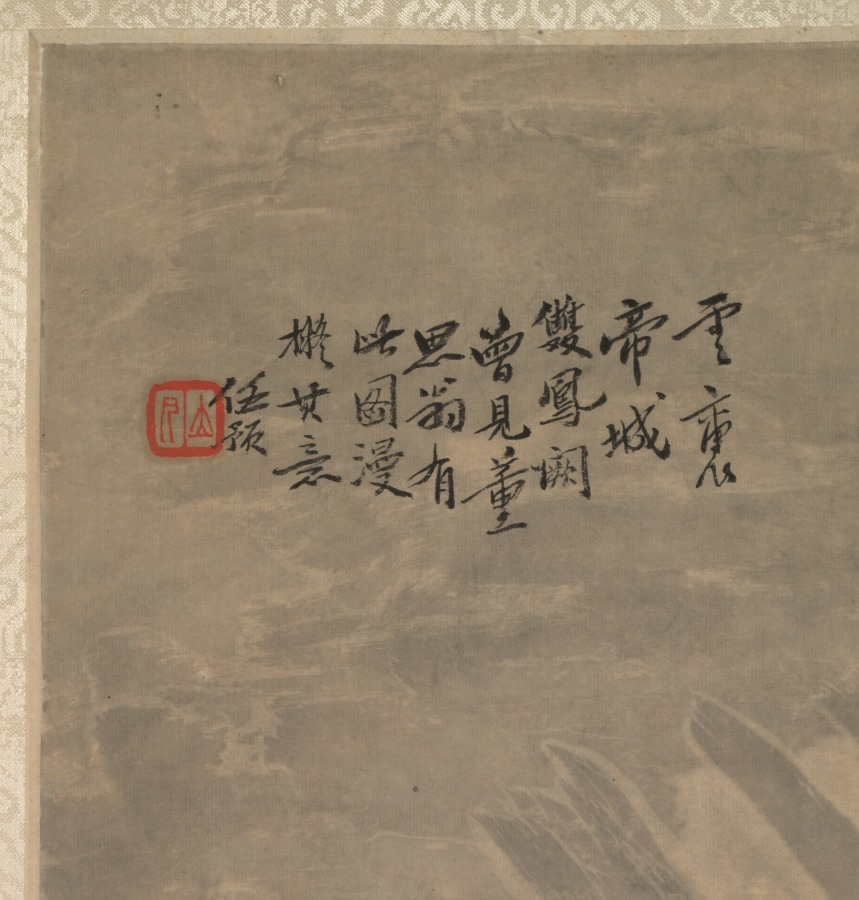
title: Landscape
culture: China, Qing dynasty (1644-1911)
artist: Ren Yu (Chinese, 1853–1901)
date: 1892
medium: Hanging scroll; color on paper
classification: Painting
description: This seasonal landscape is from a set of four hanging scrolls by Ren Yu. He was the youngest, most eccentric, and least prolific of the Four Rens, a family of prominent painters in Shanghai during the late Qing dynasty (1644–1911). Perhaps due to his opium habit and subsequent financial difficulties, Ren Yu tended to be lackadaisical in his work. The few remaining high-quality paintings hint at his artistic potential lost to opium. Though Ren’s premature death left his artistic promise unfulfilled, his paintings were acquired and donated to the museum by Charles Lang Freer (1854–1919), a wealthy businessman and art collector from Detroit. As Freer had hoped, this donation of Ren Yu paintings inspired the young Cleveland Museum of Art to continue to expand its own Chinese painting collection.